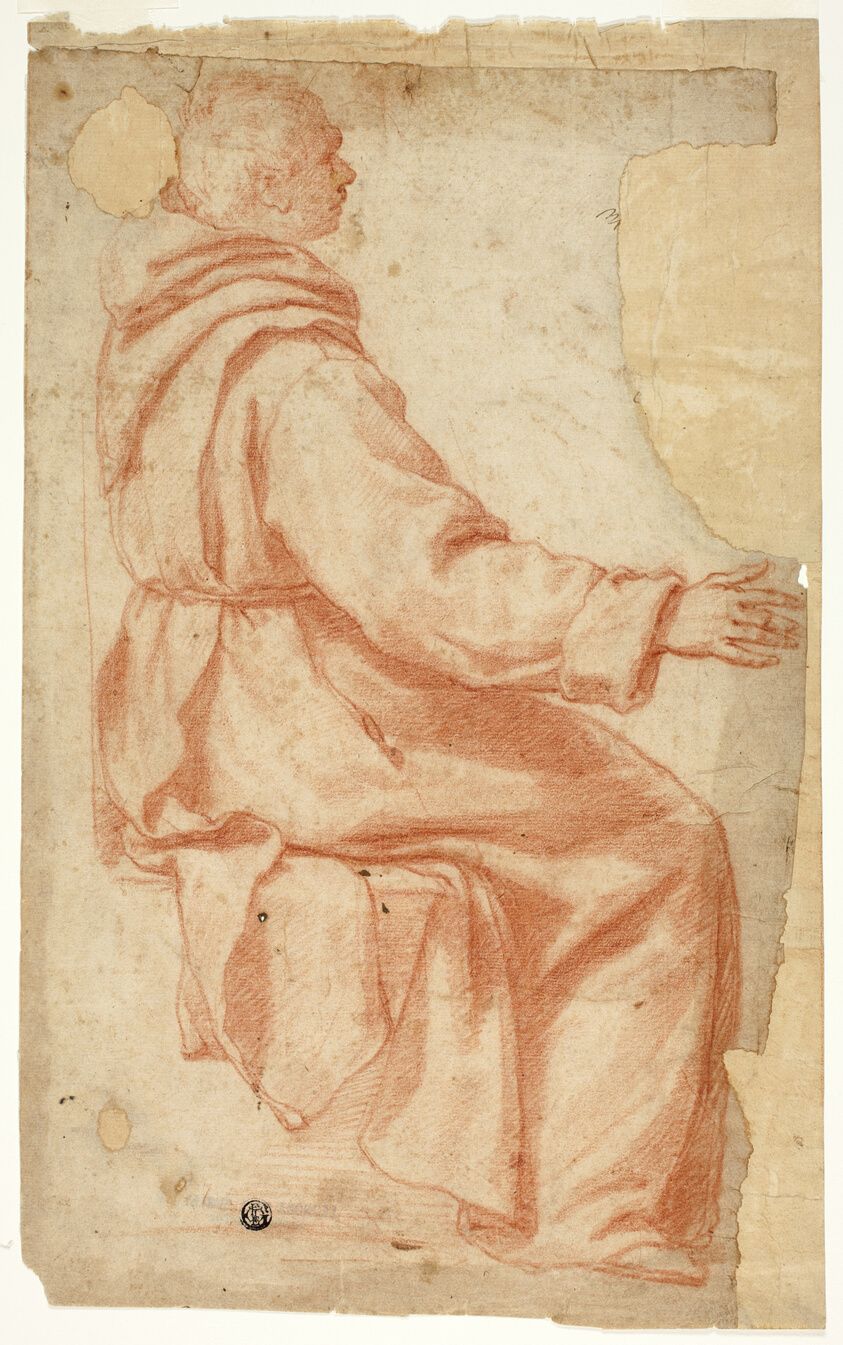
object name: Drawing and Watercolor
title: Seated Monk in Profile to Right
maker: Possibly Bartolomeo Cesi (Italian, 1556-1629); or possibly Matteo Rosselli (Italian, 1578-1650)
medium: Red chalk on ivory laid paper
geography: Italy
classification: chalk; drawings (visual works); prints and drawing